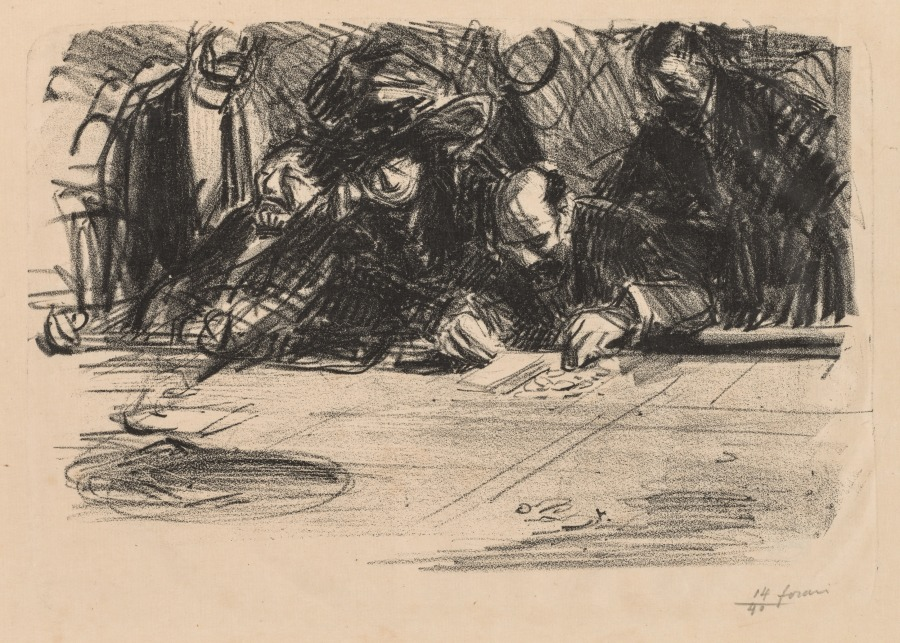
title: Groupe de joueurs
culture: France, 19th-20th century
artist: Jean Louis Forain (French, 1852–1931)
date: late 1800s–early 1900s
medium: lithograph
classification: Print